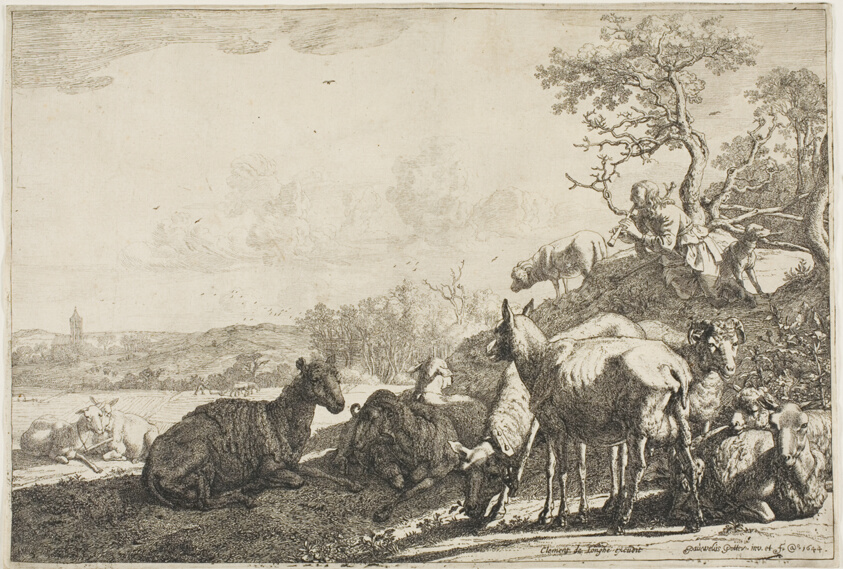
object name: Print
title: The Shepherd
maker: Paulus Potter (Dutch, 1625-1654)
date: 1644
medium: Etching on ivory laid paper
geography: Holland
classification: print; prints and drawing